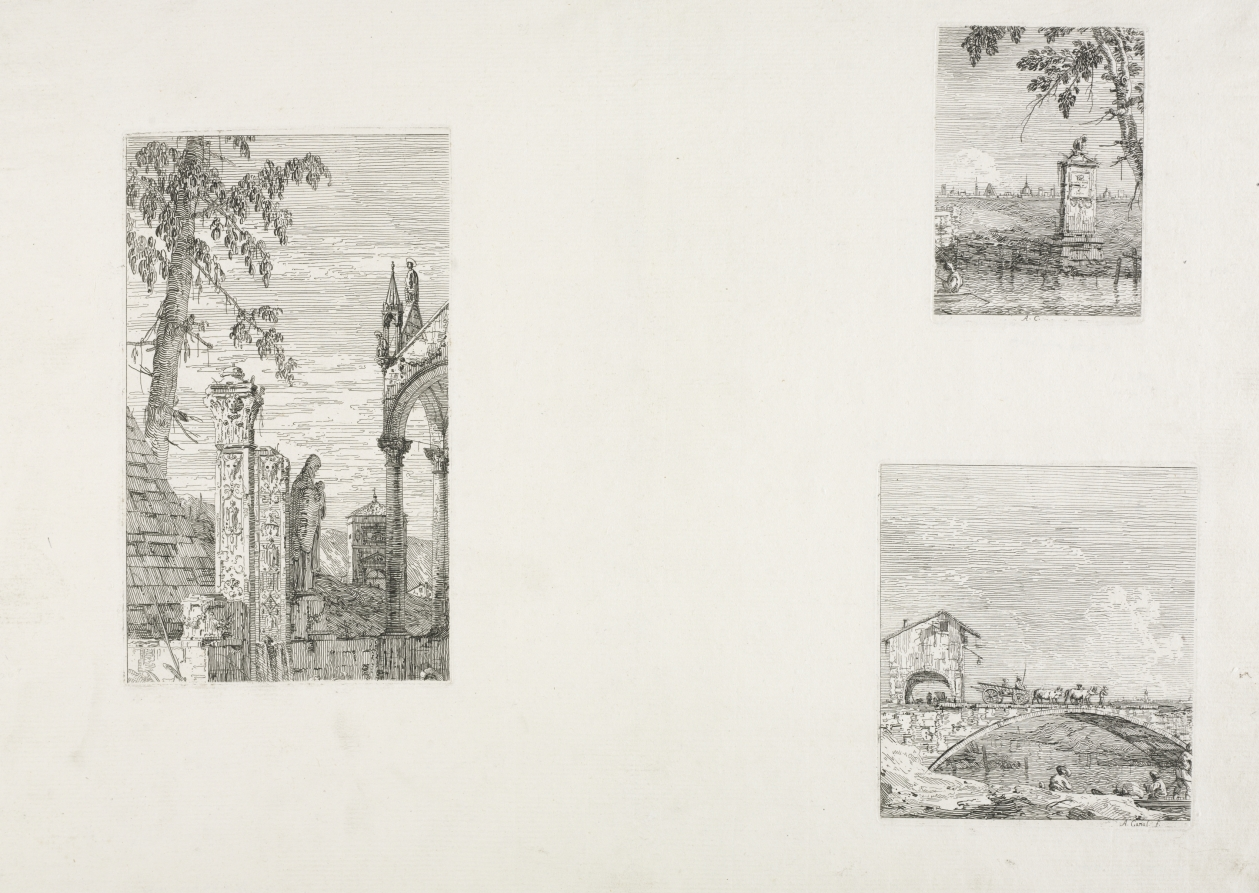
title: Views: Fragments of Sculpture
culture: Italy, Venice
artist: Antonio Canaletto (Italian, 1697–1768)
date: 1735–1746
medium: etching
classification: Print